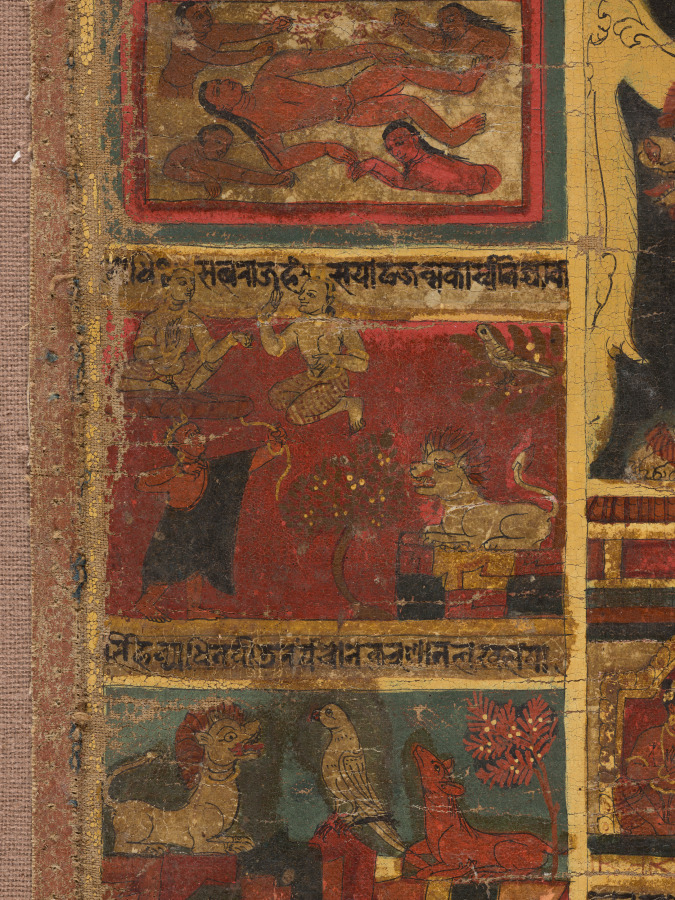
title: Bejeweled Buddha Preaching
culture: Nepal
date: 1648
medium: Gum tempera, ink, and gold on cloth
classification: Painting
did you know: Nepalese devotional paintings on cloth are called "paubha" in the Newari language.